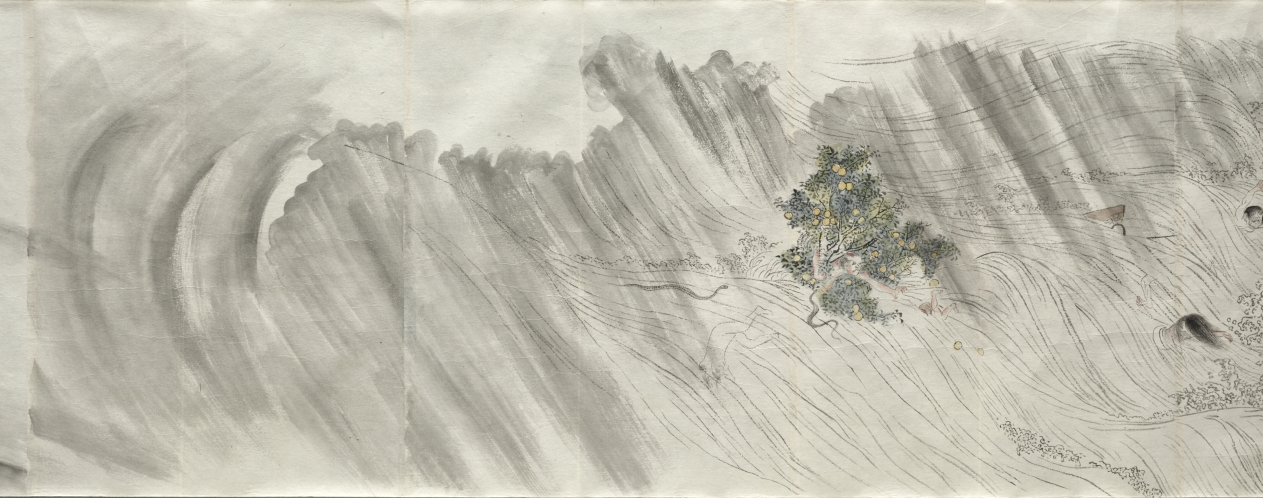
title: Sketch Copy of Natural Disasters, from the Seven Fortunes and Misfortunes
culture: Japan, Edo period (1615–1868) to Meiji period (1868–1912)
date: after 1773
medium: handscroll; ink and color on paper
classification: Painting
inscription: Signed: Gettcho; dated 1773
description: This unmounted handscroll is a copy of the first of a three-scroll set painted by Maruyama Ōkyo (1733–1795) for Buddhist monk Yujō (1723–1773). It depicts people's unfortunate encounters with forces of nature from wind to beasts. Ōkyo's realistic, contemporary imagery was meant to evoke a sense of recognition and empathy in viewers, shocking them into avoidance of possible punishments.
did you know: Notations that appear throughout the scroll indicate colors and other details of the original painting.